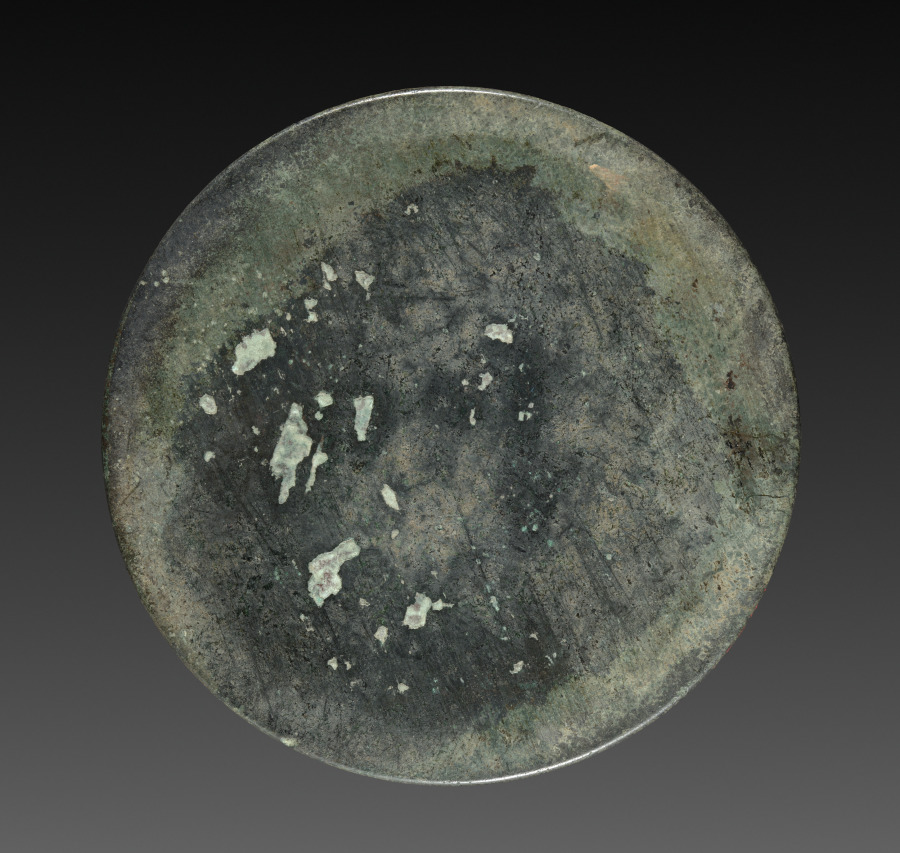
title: Mirror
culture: Japan, Heian period (794–1185)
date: 794–1185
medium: bronze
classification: Metalwork